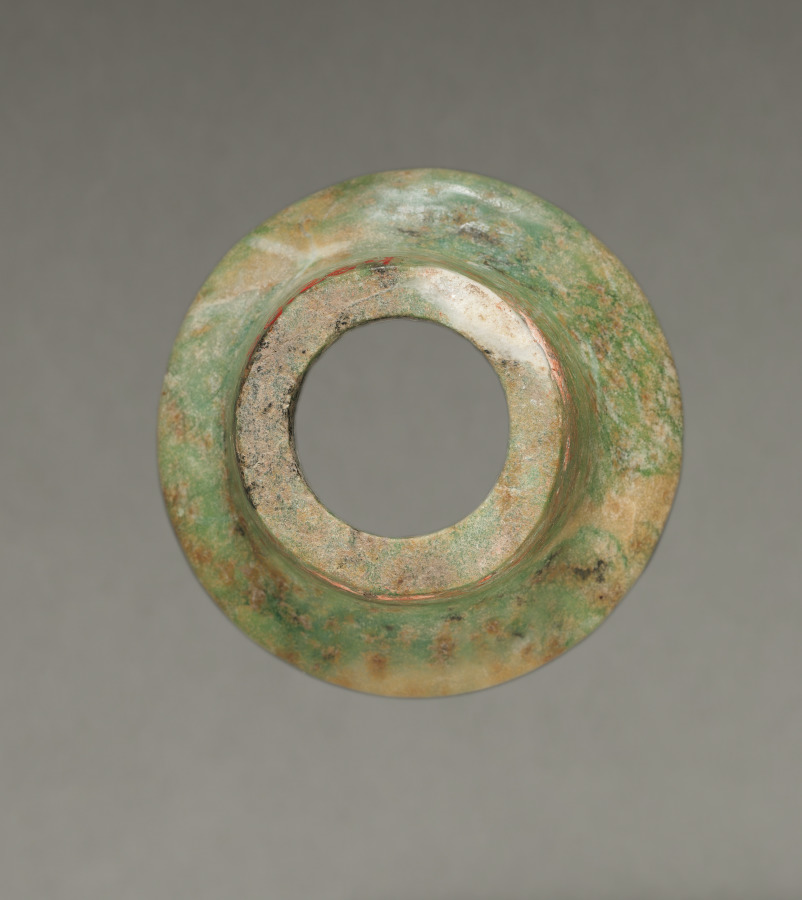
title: Ear Ornament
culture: Central Mexico, Teotihuacán style, Classic period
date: 150–200 CE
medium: jadeite-albitite(?)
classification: Sculpture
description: Near Teotihuacán's largest palace is a small temple gorgeously ornamented with green-feathered serpents, symbols of the earth's fertility. Beneath the temple lie at least 120 human sacrifices, most men, many warriors, and some wearing greenstone ornaments like these, perhaps a set. The sacrifices, apparently laid out to mark the cardinal directions, may have consecrated the temple or a ruler's tomb, or both.